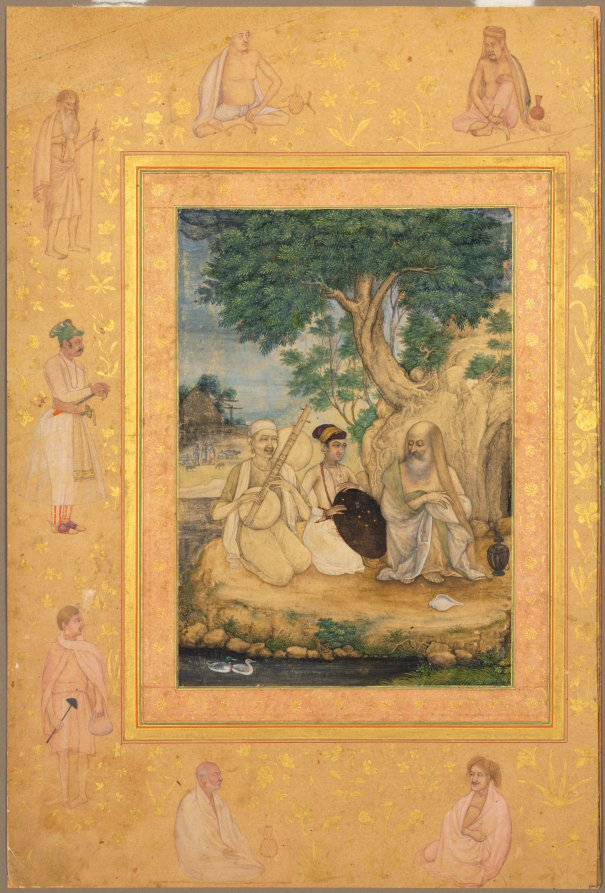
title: Prince and ascetics, from the Late Shah Jahan Album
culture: India, Mughal court, reign of Shah Jahan (1628-1658), Mughal Dynasty (1526-1756)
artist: attributed to Govardhan (Indian, active c.1596–1645)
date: c. 1630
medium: Gum tempera, ink, and gold on paper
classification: Painting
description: Most paintings in the Late Shah Jahan Album were commissioned specifically for the album, but some older finished works were chosen to be incorporated; they were removed from their original housings and inserted into the new borders. This painting of a Mughal prince visiting a Sufi holy man in his cave dwelling is one example, chosen probably because it underscores the importance of the religious dimension of Mughal life. The conch on the ground before the ascetic is blown at the beginning of prayer, which in the Sufi tradition is often sung to the accompaniment of music. The pair of ducks in the foreground imply the harmonious union of the spiritual and temporal in the Mughal realm. Mendicant Islamic ascetics fill the borders on this page, except for the one noble retainer standing by the prince.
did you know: The holy man sits under a tree, an ancient Indian place of honor.